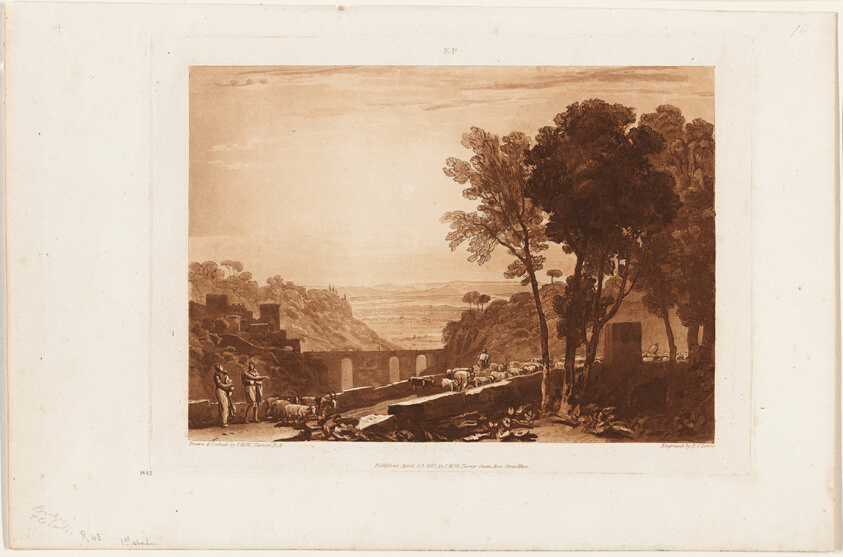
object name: Print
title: The Bridge and Goats, plate 43 from Liber Studiorum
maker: Joseph Mallord William Turner (English, 1775-1851); Engraved by Fredrick Christian Lewis (English, 1779-1856)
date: published April 23, 1812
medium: Etching and aquatint in brown on ivory wove paper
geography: England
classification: etching; print; prints and drawing